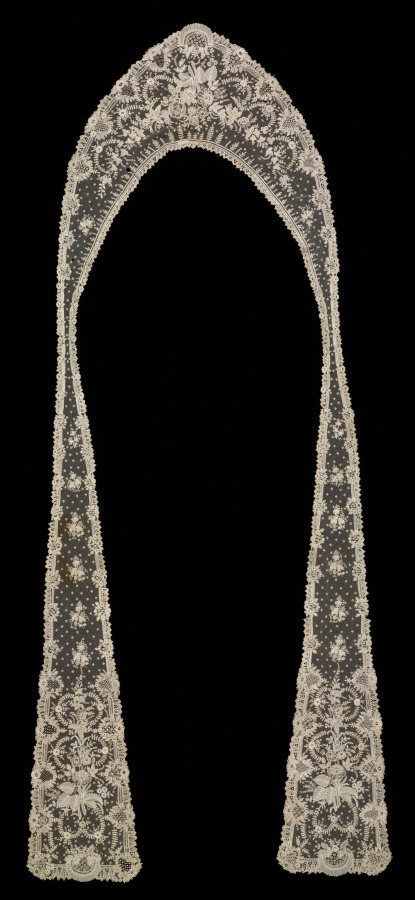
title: Fichu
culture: France or Belgium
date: c. 1875–80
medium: Composite lace. Machine-made netting (reseau), Brussels bobbin lace and French needle point lace; linen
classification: Lace